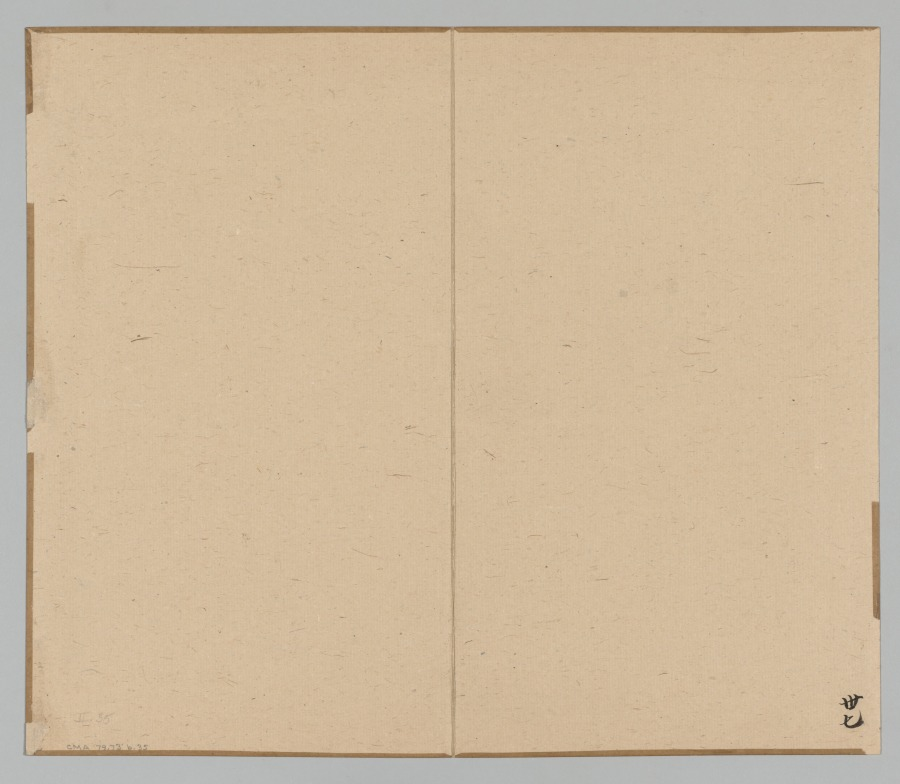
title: Reverberations of Taiga, Volume 2 (leaf 35)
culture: Japan, Edo period (1615–1868)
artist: Aoki Shukuya (Japanese, d. 1802)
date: mid- to late 1700s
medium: double-leaf from pair of albums; ink and light color on paper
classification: Portfolio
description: Traditionally, young painters in Japan began their studies with an established master-painter. The master's compositions invariably became models that the apprentice copied to learn various ink and brush techniques. Shukuya was a pupil of the famous Kyoto artist Ikeno Taiga, whose style is reflected in these sketches of rocks, trees, and mountains.